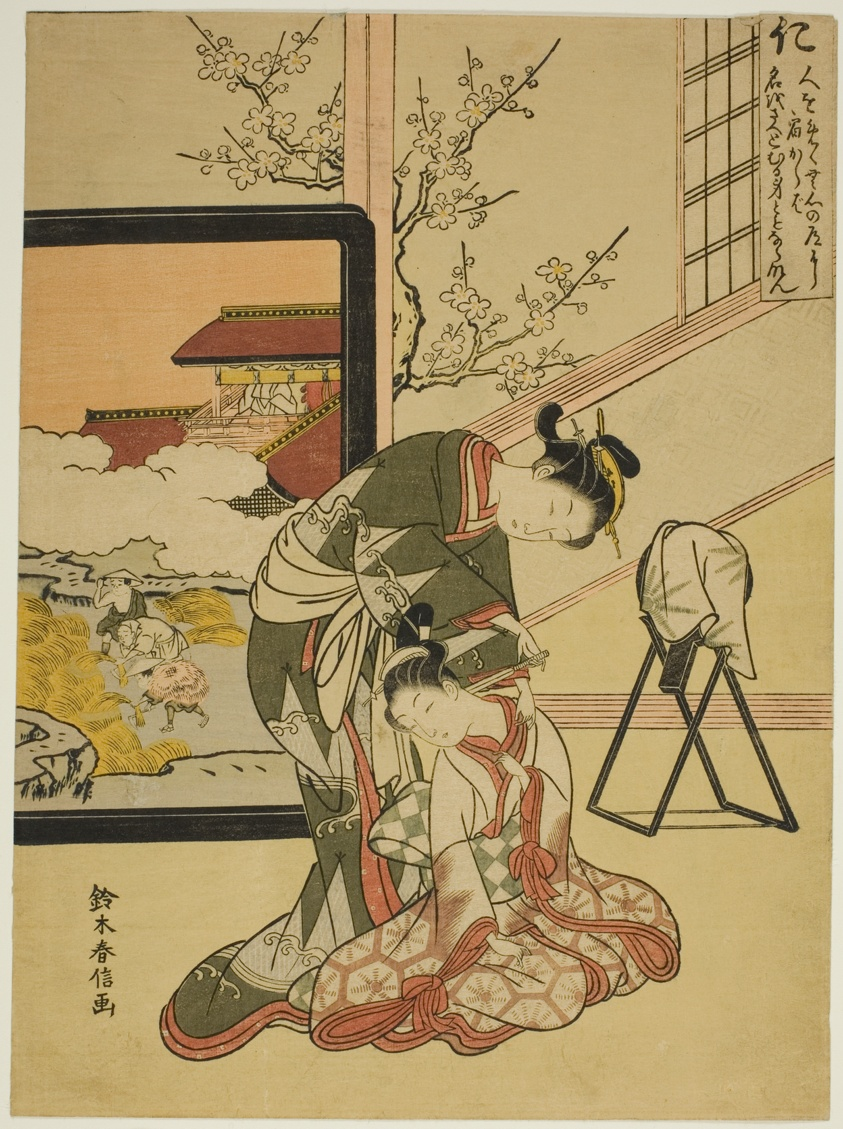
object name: Print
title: Benevolence (Jin), from the series "Five Cardinal Virtues"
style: Japanese (culture or style)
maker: Suzuki Harunobu 鈴木 春信; Japanese, 1725 (?)-1770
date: 1767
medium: Color woodblock print; chuban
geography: Japan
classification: woodblock print; print; asian art